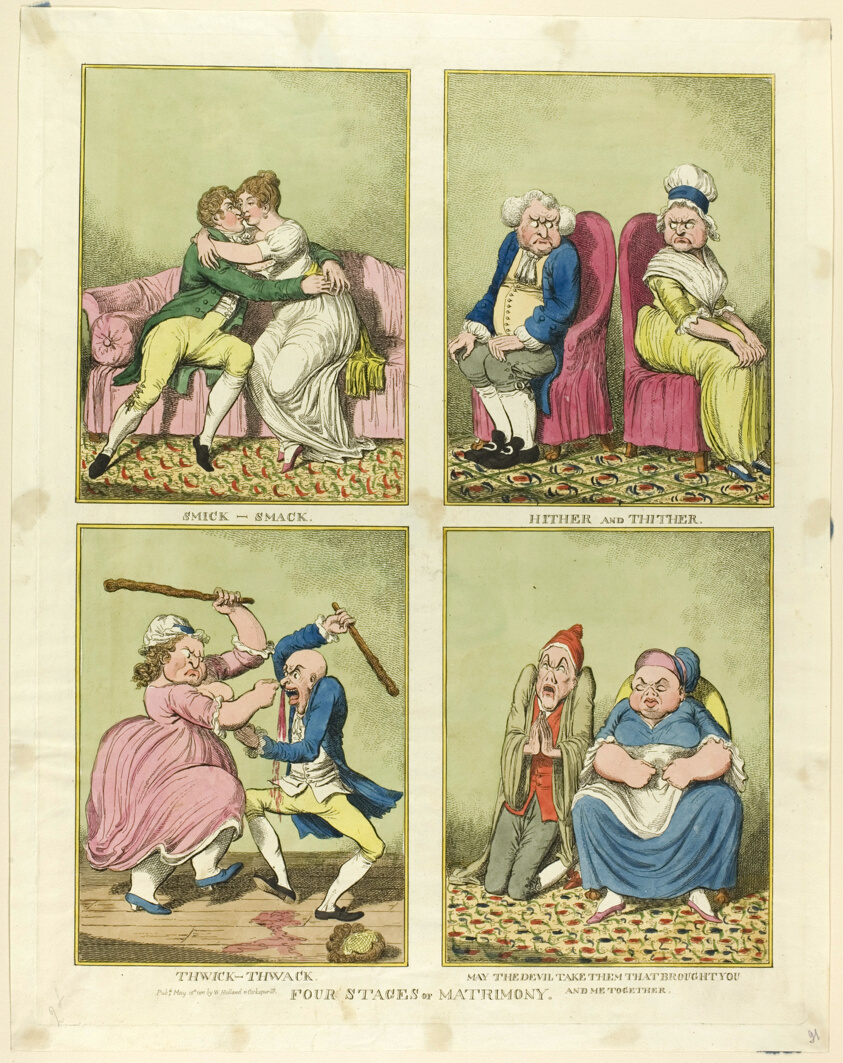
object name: Print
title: Four Stages of Matrimony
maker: after Richard Newton (English, 1777-1798); published by William Holland (English, 1757-1815)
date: published May 15, 1811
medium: Etching, with hand-coloring, on paper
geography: England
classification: etching; print; prints and drawing